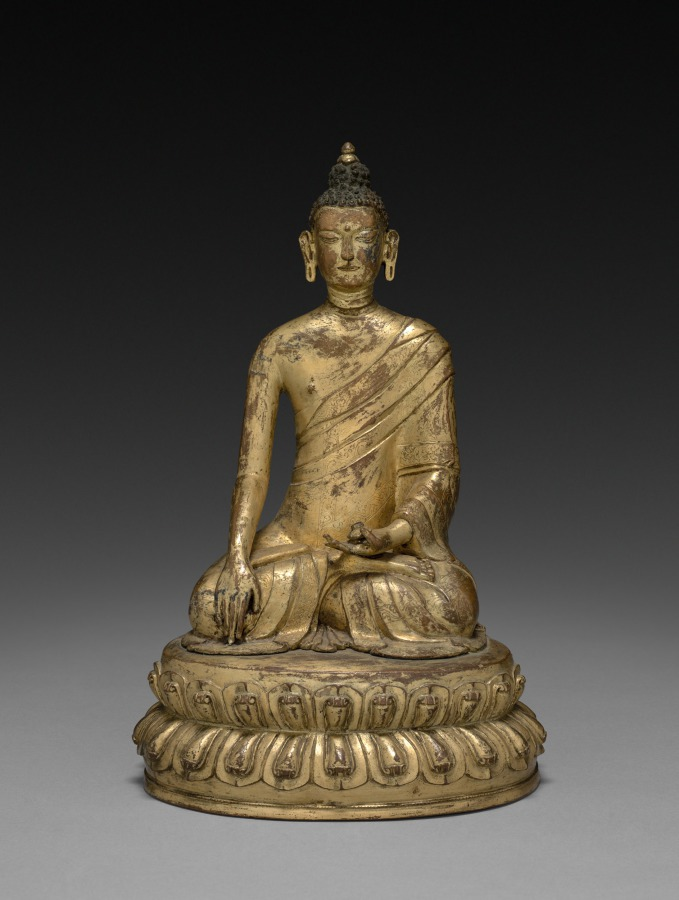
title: Buddhist Triumphant over Temptation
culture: China, Yuan dynasty (1271-1368)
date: c. 1300–1320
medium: gilt bronze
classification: Sculpture